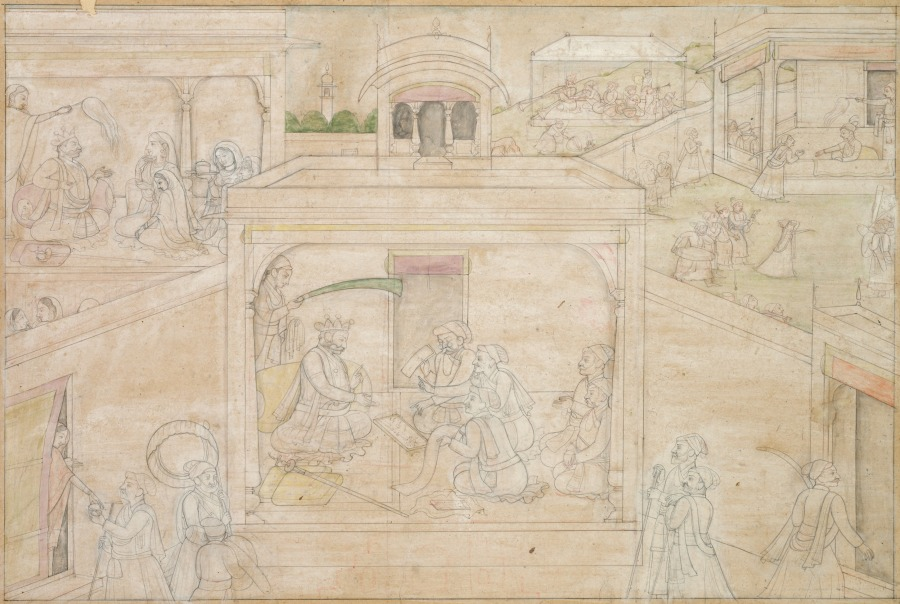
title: Bhima’s consultation with the astrologer, from a Nala-Damayanti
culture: Northern India, Pahari kingdoms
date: c. 1790–1800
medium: Gum tempera and ink on paper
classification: Painting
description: In the central pavilion, King Bhima, father of the beautiful Damayanti, receives favorable signs from his astrologers for the marriage of his daughter to her beloved, Nala. In the upper left corner, King Bhima tells the good news to his daughter, while messengers inform Nala in the upper right. Musicians and dancers already begin to celebrate. This lyrical series depicts scenes from the extended romantic poem of the 1100s, based on an episode from the Sanskrit epic Mahabharata.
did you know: This drawing is part of a series of forty-eight, most of which are held by the Museum of Fine Arts, Boston.